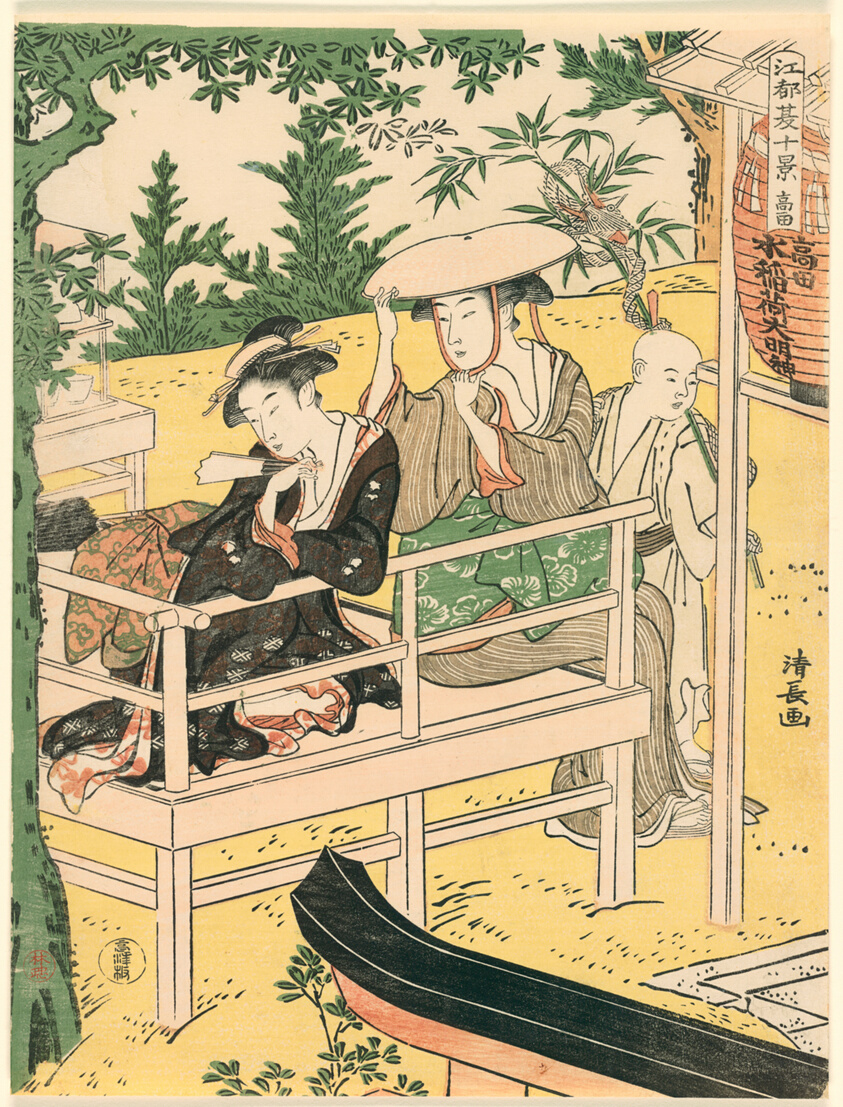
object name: Print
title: Takata, from the series "Ten Summer Scenes in Edo (Edo natsu jikkei)"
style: Japanese (culture or style)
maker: Torii Kiyonaga (Japanese, 1752-1815)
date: c. 1787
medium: Color woodblock print; chuban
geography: Japan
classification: woodblock print; print; asian art